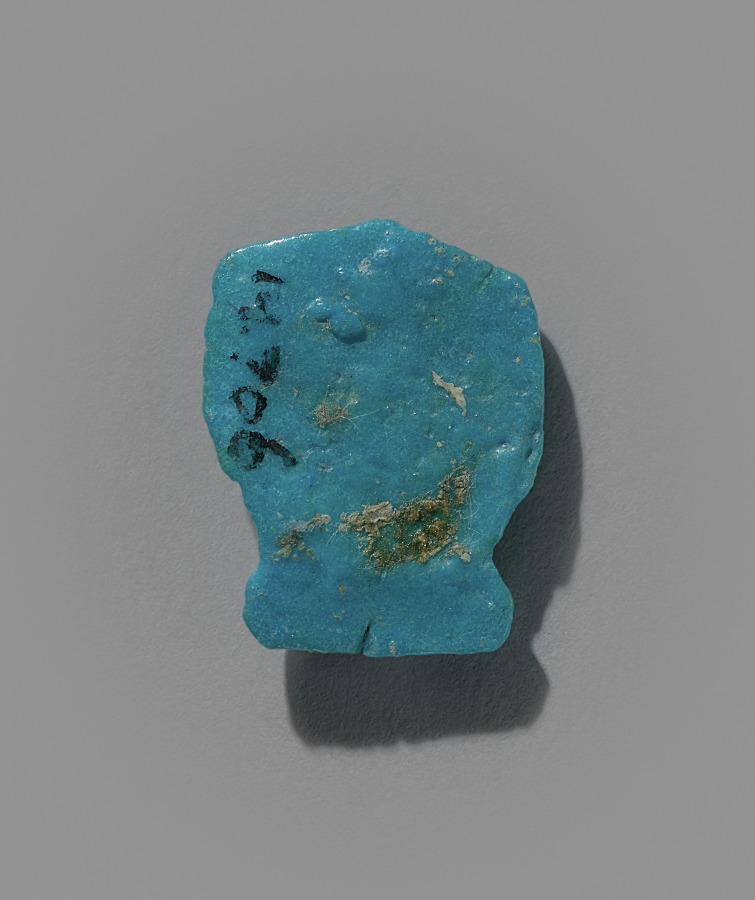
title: Food Model Amulet: Brace of Duck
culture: Egypt, New Kingdom (1540–1069 BCE), Dynasties 19–20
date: 1295–1069 BCE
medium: faience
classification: Amulets